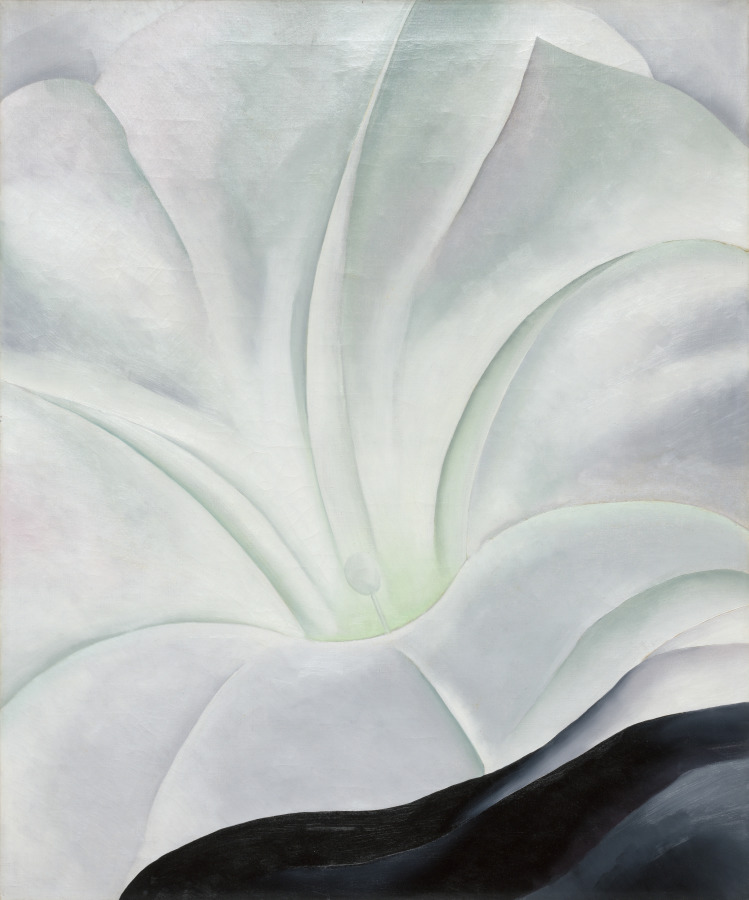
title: Morning Glory with Black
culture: America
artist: Georgia O'Keeffe (American, 1887–1986)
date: 1926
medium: oil on canvas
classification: Painting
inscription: Verso: "G OKeeffe -- 1926" (white paint)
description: O'Keeffe is best known for close-up flower subjects whose magnified forms fill the entire space of each canvas. Likely inspired by similar compositions in modern photography, these images are not only celebrations of nature, but also striking essays in abstract design. Although many critics interpreted O'Keeffe's flower paintings as reflections of femininity in general and female sexuality in particular, the artist strongly opposed such readings. Throughout most of her career, she frequently attempted to persuade others to discuss her work without referring to her gender, writing on one occasion, "I have always been very annoyed at being referred to as a 'woman artist' rather than an 'artist.'"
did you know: The morning glory rests against a black petunia, seen partially at lower right.